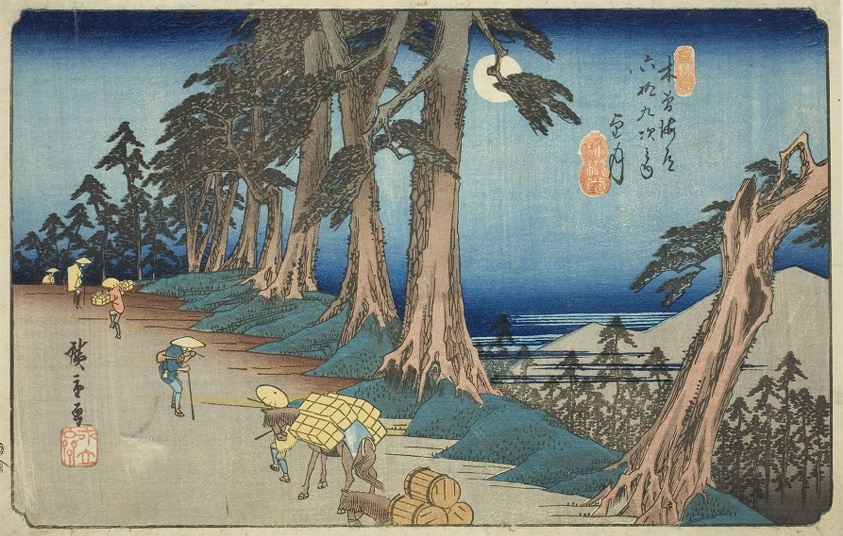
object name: Print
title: No. 26: Mochizuki, from the series "Sixty-nine Stations of the Kisokaido (Kisokaido rokujukyu tsugi no uchi)"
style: Japanese (culture or style)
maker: Utagawa Hiroshige 歌川 広重; Japanese, 1797-1858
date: c. 1835/38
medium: Color woodblock print; oban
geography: Japan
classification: woodblock print; print; asian art